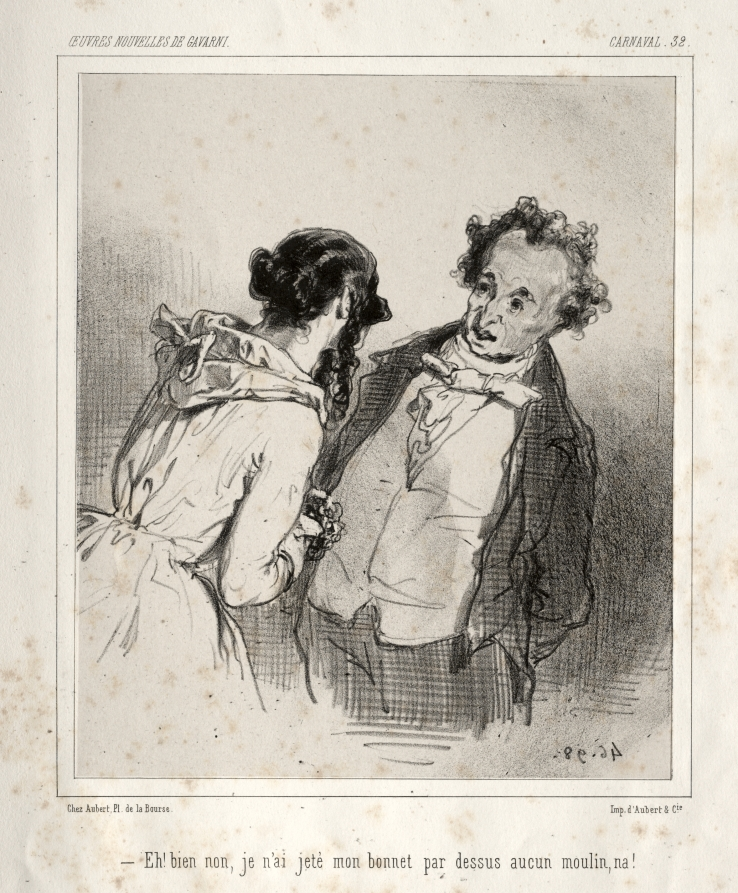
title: Carnaval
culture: France, 19th century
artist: Paul Gavarni (French, 1804–1866)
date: c. 1841–47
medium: lithograph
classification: Print